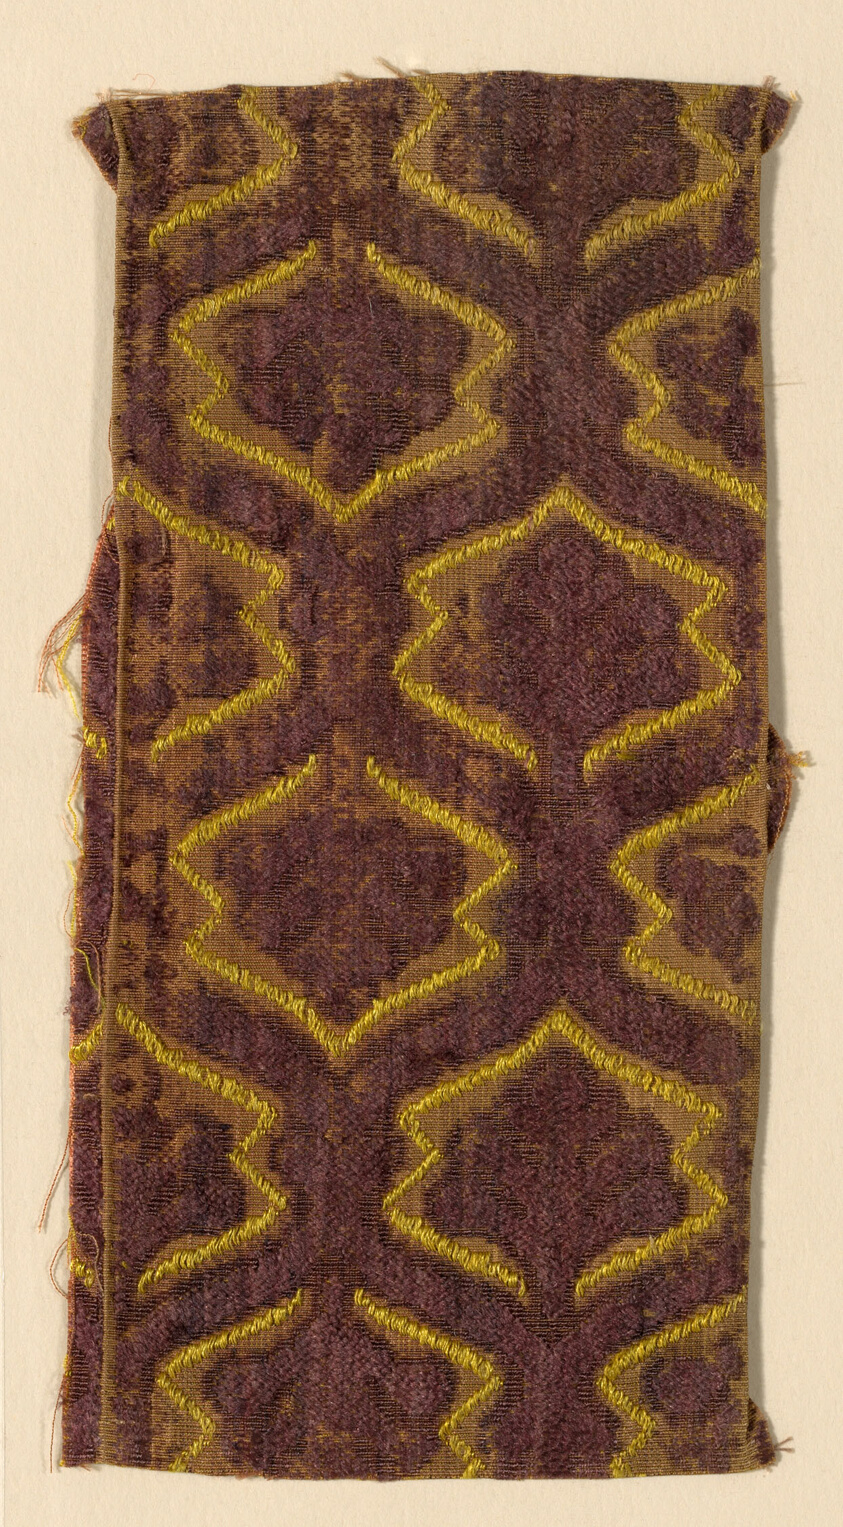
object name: Textile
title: Fragment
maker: Italy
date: 17th century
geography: Italy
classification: textile; weaving - velvet; weaving